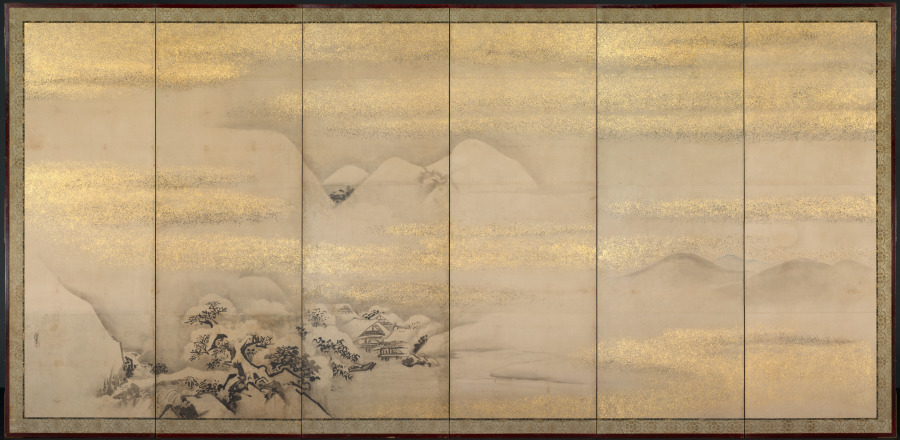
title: Summer and Winter Landscapes (one of a pair)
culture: Japan, Edo period (1615–1868)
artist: Kano Naonobu (Japanese, 1607–1650)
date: 1600s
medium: six-panel folding screen; ink on gold- and silver-decorated paper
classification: Painting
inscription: signed: "Jitekisai Naonobu"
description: This sparse composition depicts a summer scene on the right and a winter scene on the left. Careful observation reveals that the pair of screens was once damaged, and a later conservation including new sections of paper and inpainting sought to preserve the original flavor of the paintings so they could continue to be appreciated. Kano Naonobu was born in Kyoto, the younger brother of major painter and authenticator Kano Tan’yū (1602–1674). He relocated to Edo (present-day Tokyo) at the behest of the Tokugawa government in 1630 where he worked with his brother and teacher. In Kyoto, he helped his brother with paintings for Nijō Castle and the major Pure Land Buddhist temple Chion’in.